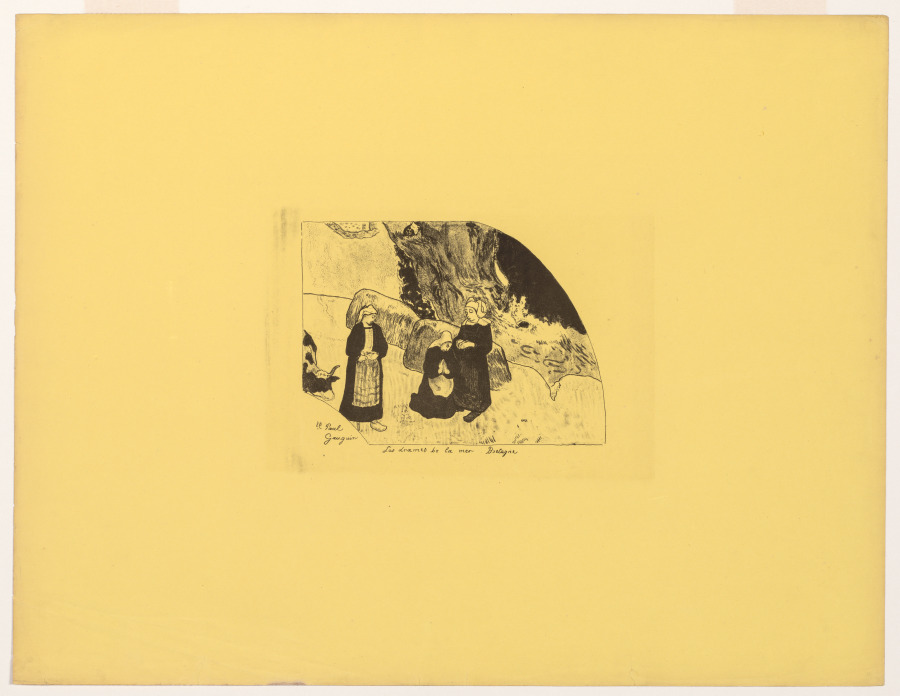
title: Volpini Suite: Dramas of the Sea: Brittany (Les Drames de la Mer, Bretagne)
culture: France, 19th century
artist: Paul Gauguin (French, 1848–1903)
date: 1889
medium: zincograph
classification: Print